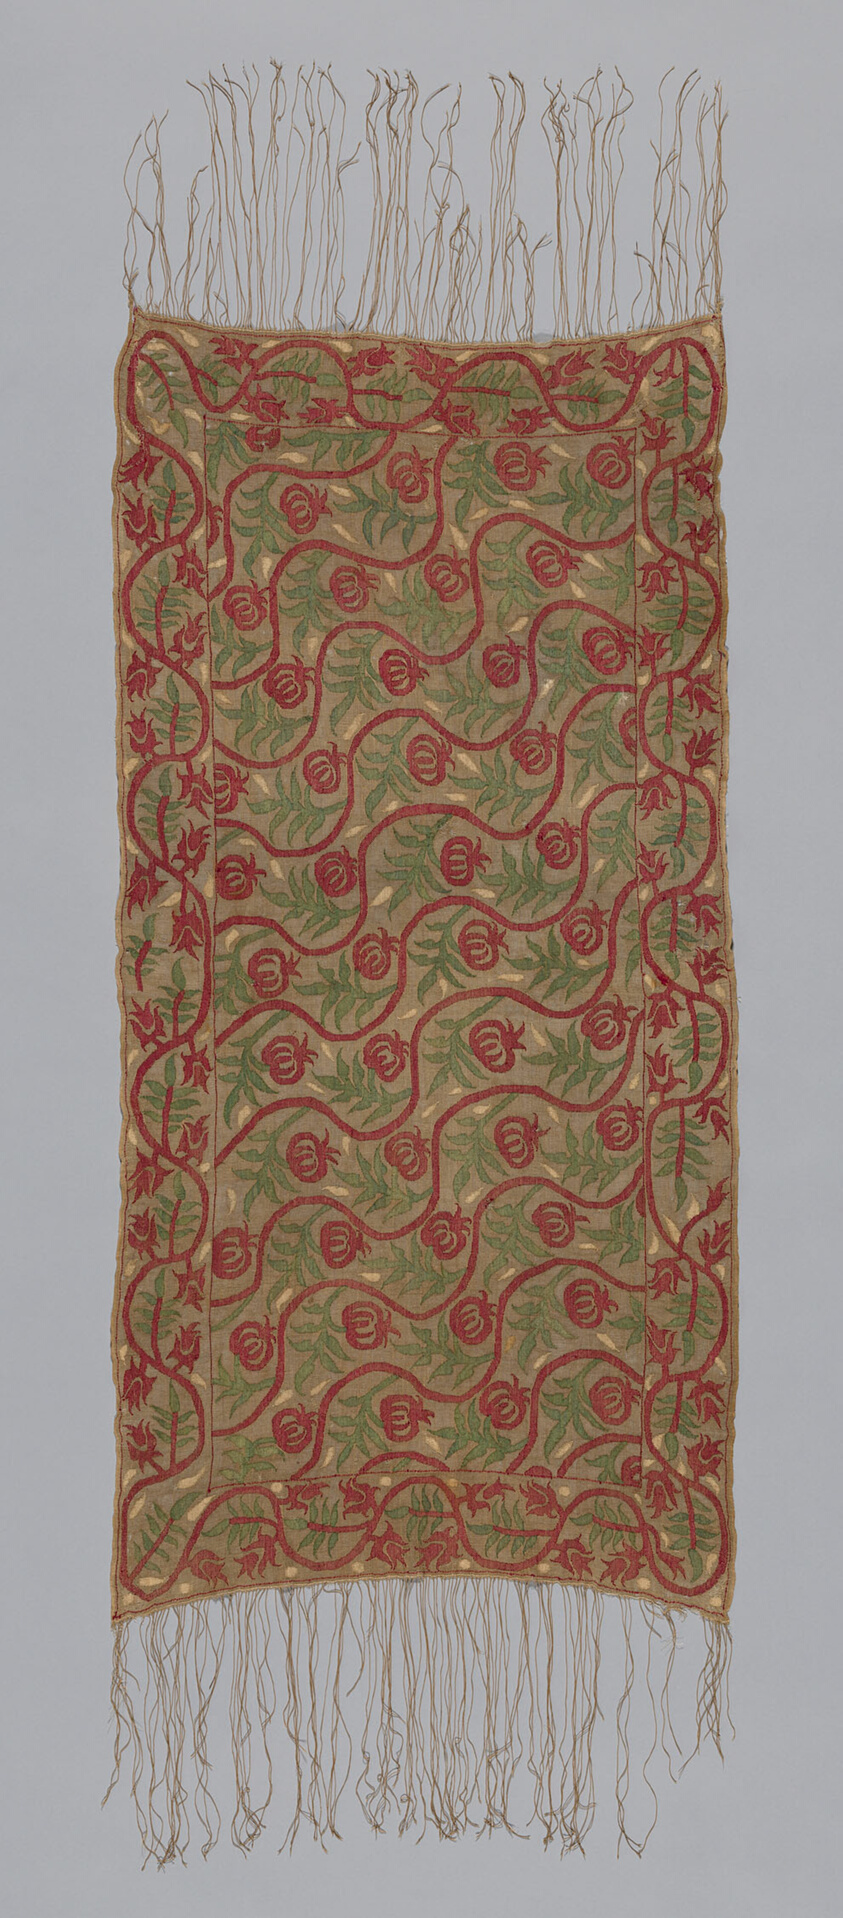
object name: Textile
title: Cover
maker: Turkey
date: 17th century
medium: Linen, plain weave; embroidered with silk floss in running stitches, pattern darning; main warp fringe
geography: Turkey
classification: textile; needlework (visual works); weaving